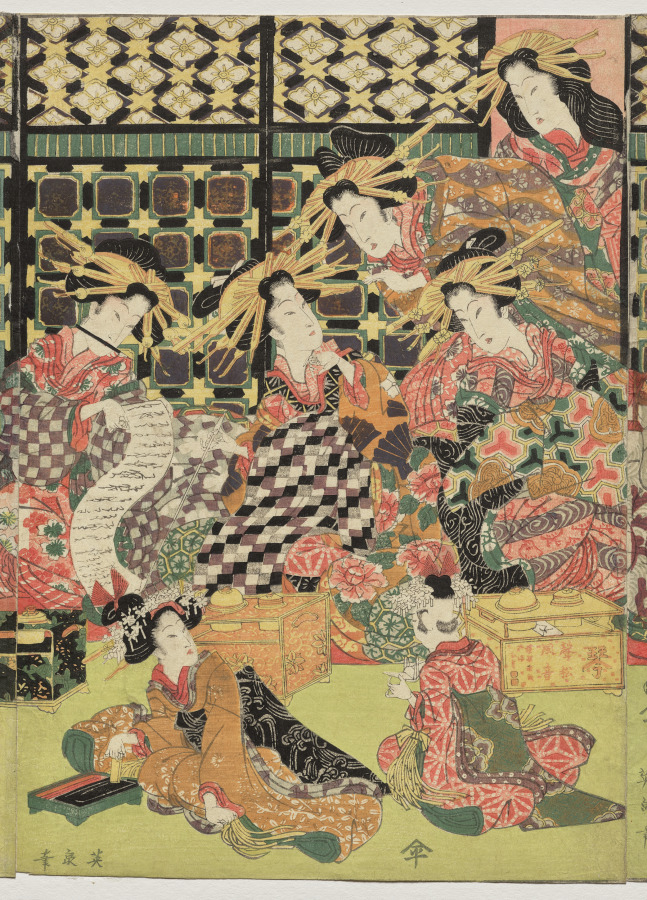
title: A Picture of the Viewing in the Pleasure Quarters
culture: Japan, Edo period (1615–1868)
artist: Kikukawa Eizan (Japanese, 1787–1867)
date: 1810s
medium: color woodblock print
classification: Print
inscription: Signature: Keisai Eisen hitsu Publisher: Omiya Heihachi (Hei) Seal: kiwame